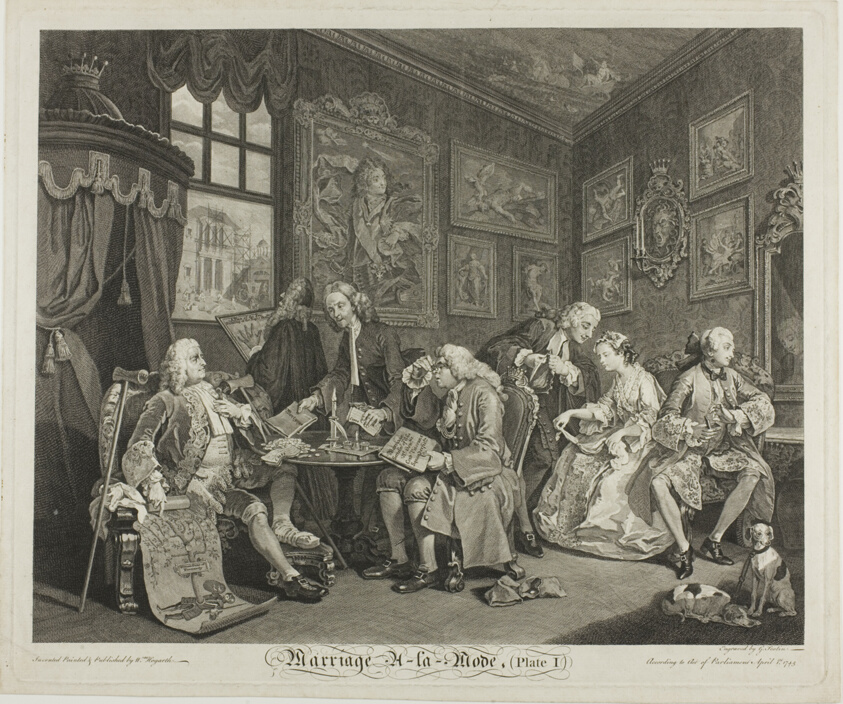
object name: Print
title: Plate One, from Marriage à la Mode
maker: Gérard Scotin II (French, 1698-1755); after William Hogarth (English, 1697-1764)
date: 1745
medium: Etching and engraving in black on ivory laid paper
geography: France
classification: etching; paper; print; prints and drawing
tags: dogs, animals